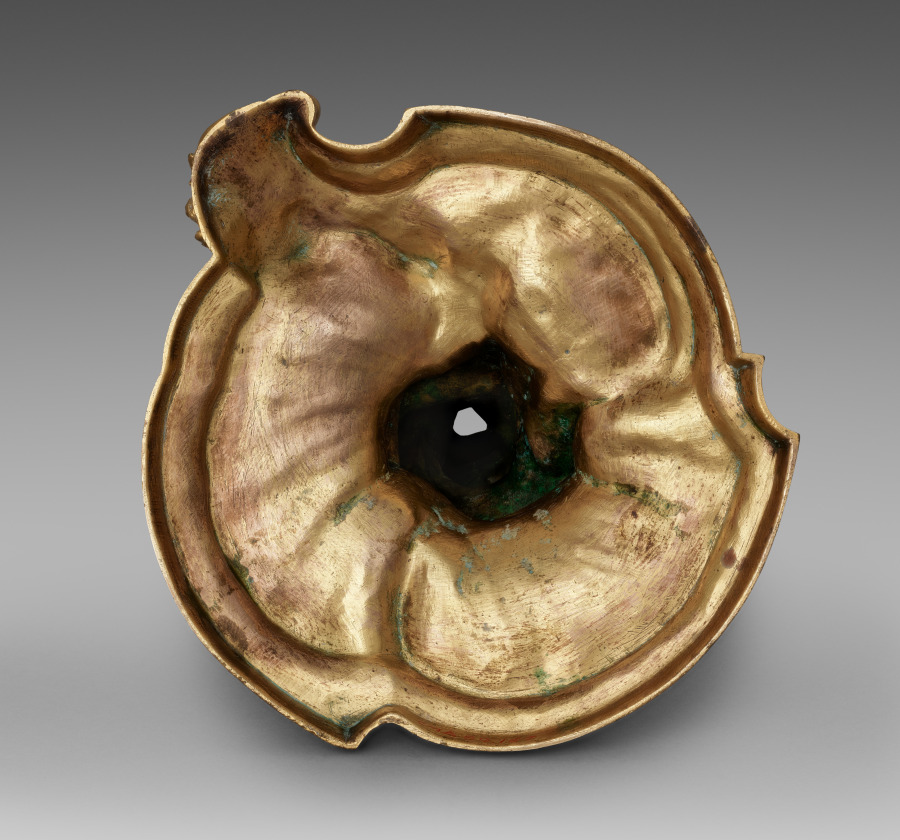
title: Candlestick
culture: France, 18th century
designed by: Juste-Aurèle Meissonnier (French, 1695–1750)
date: c. 1740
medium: gilt metal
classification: Furniture and woodwork